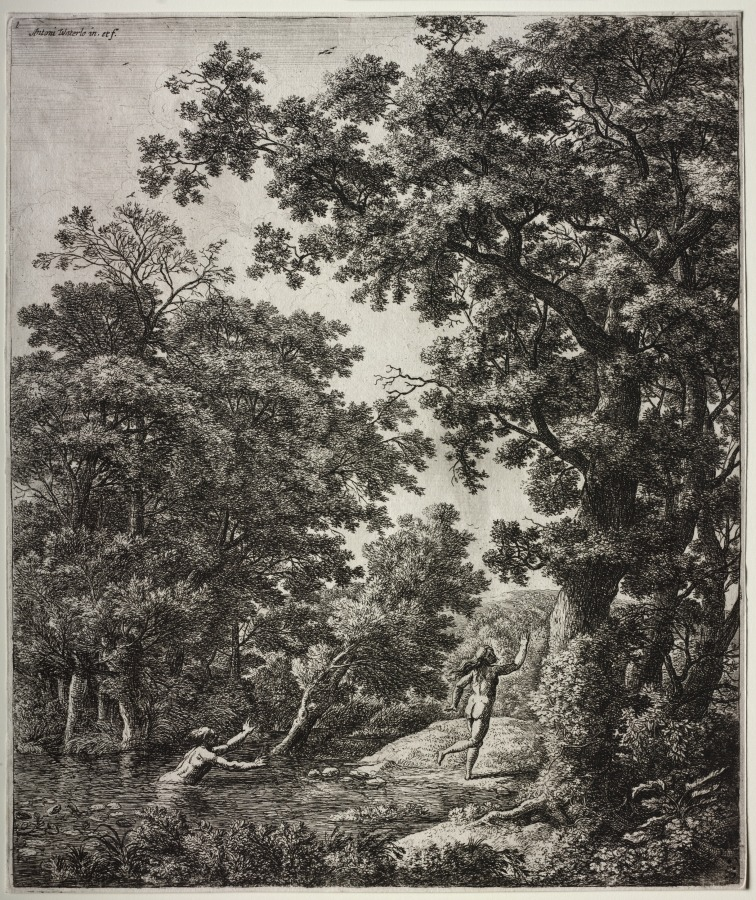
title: Six large upright landscapes with scenes from Ovid's Metamorphoses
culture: Netherlands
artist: Anthonie Waterloo (Dutch, 1609/10–1690)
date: 1640–90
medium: etching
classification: Print